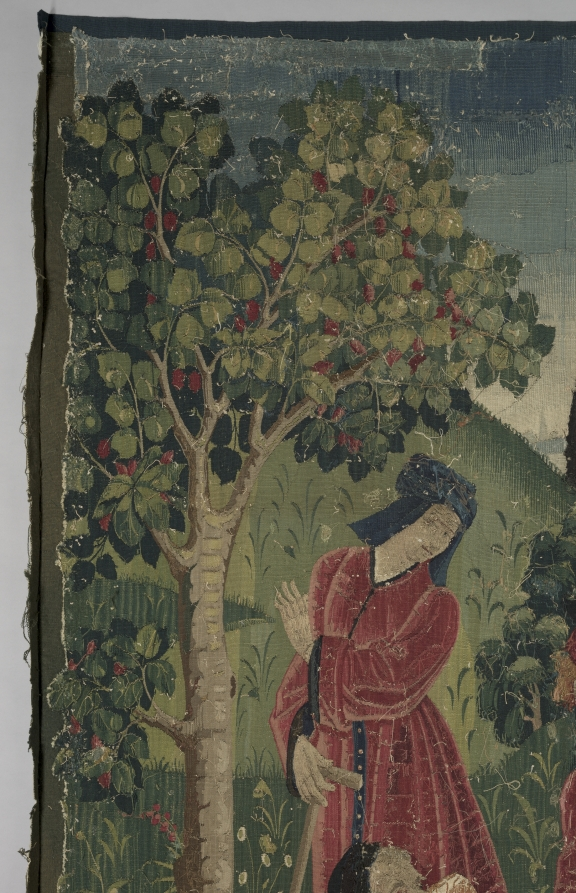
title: Time (from Chateau de Chaumont set)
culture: France, Lyon(?), early 16th century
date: 1512–15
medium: silk and wool; tapestry weave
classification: Tapestry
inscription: French verse in Gothic letters translates as follows: "One sees the weather adorned in green, Sometimes as pleasing as an angel; To suddenly change and be quite strange, The weather never stays the same."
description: Pierre Sala, who likely commissioned the set, is portrayed as the richly attired central figure offering a bouquet, a symbol of knowledge, to Éléonore, his daughter. Éléonore is pregnant, revealed by her upturned skirt and the persimmon in her husband Hector’s hand. Hector’s mother, Marguerite, in dark attire, will wed the widowed Sala in 1519. They appear in front of the royal chateau of Blois. The figures at the right convey Sala’s advice to his children. Time (the old man with the staff) with Clio, the Muse of History, standing on his shoulders, is being attacked by a Herculean youth wielding a stick. With this allegory, Sala is explaining that youth is ignorant of the complexities of life and time. The small unicorn at the far right represents the soul. The verse in Old French at the top refers to changing time: One sees Time adorned with green foliage, Sometimes as pleasant as an angel, Then suddenly change and become quite strange. Never does Time persist in one state.